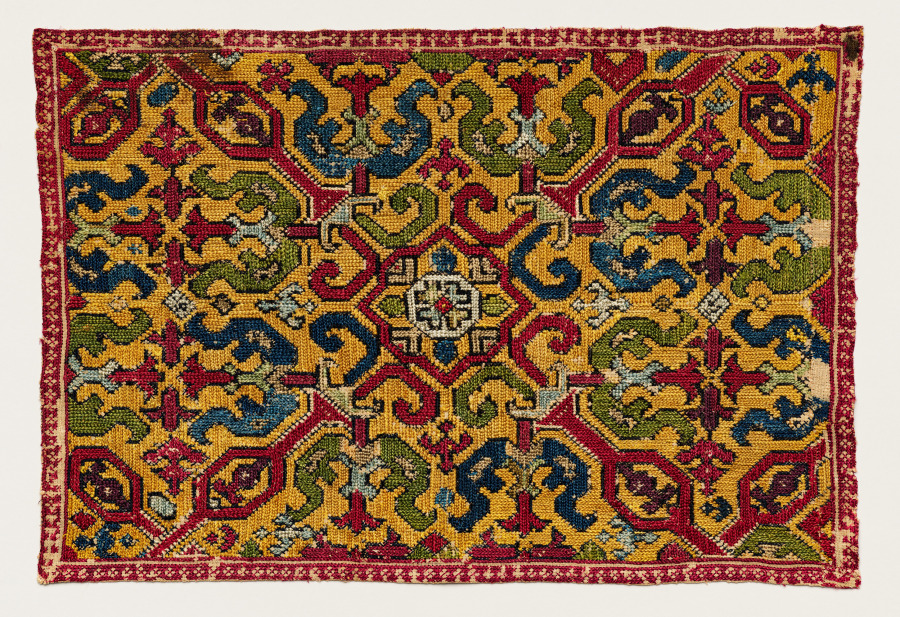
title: Fragment of a furnishing textile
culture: Africa, North Africa, Morocco, Chefchaouen, Moroccan embroiderer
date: 1600s–1700s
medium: Linen, silk, dye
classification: Embroidery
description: This fragment strongly resembles a component of furnishing textiles produced in the city of Chefchaouen, Morocco. While this is a cut fragment, the full textile would consist of several embroidered panels.